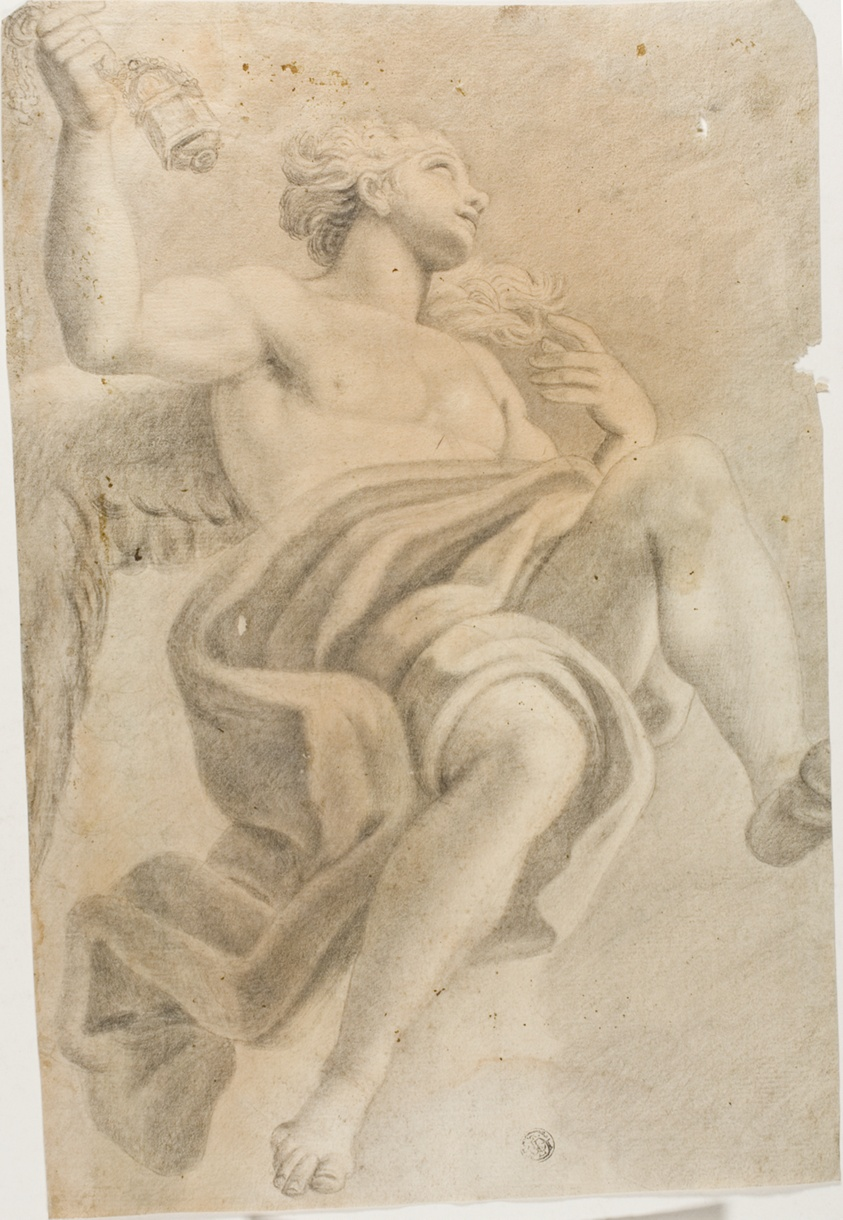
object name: Drawing and Watercolor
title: Angel with Censer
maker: Unknown Artist; Italian, 17th century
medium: Black chalk, with stumping, on cream laid paper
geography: Italy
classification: chalk; drawings (visual works); prints and drawing